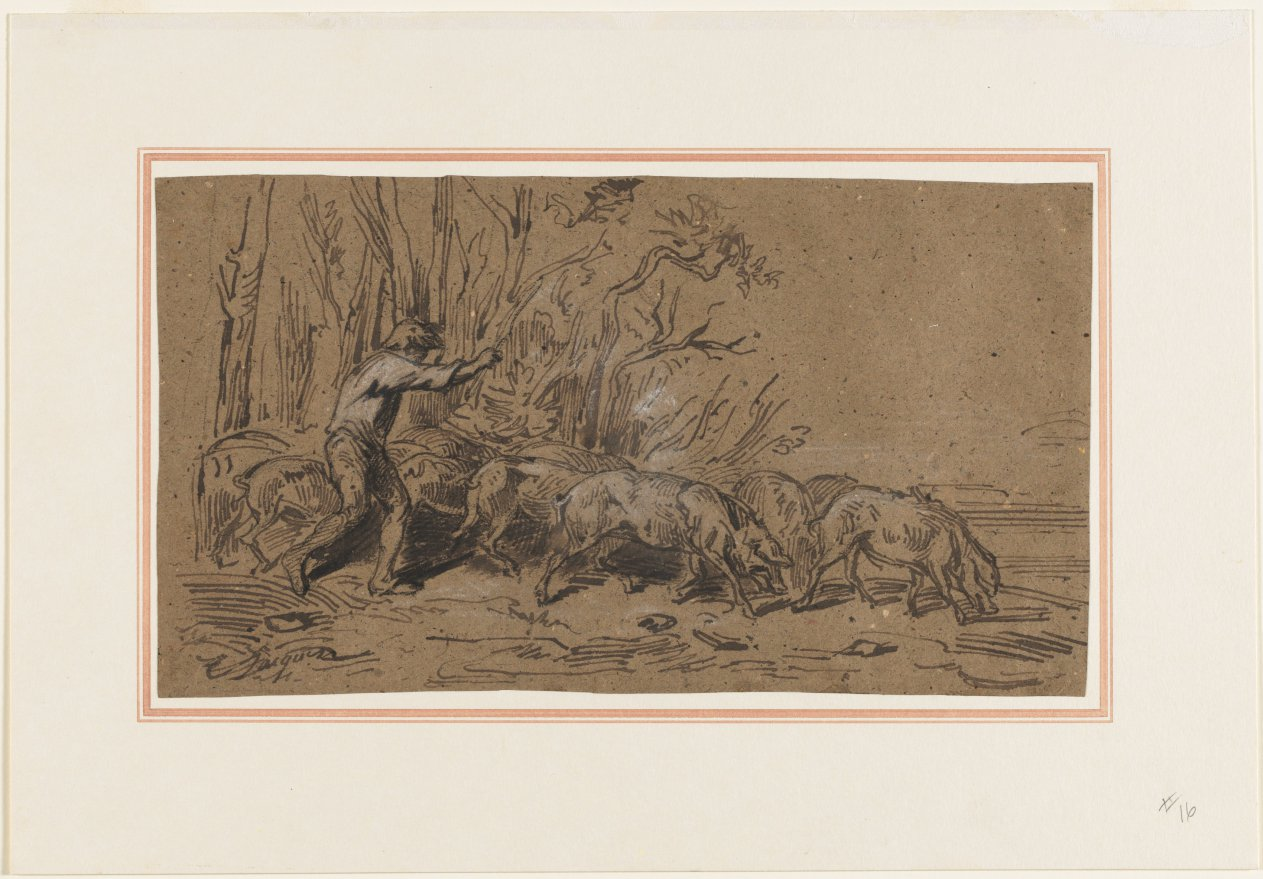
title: The Truffle Gatherers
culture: France, 19th century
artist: Charles-Émile Jacque (French, 1813–1894)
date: c. 1849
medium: brown ink heightened with black and white chalk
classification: Drawing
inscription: Signed, lower left in brown ink: C. Jacque